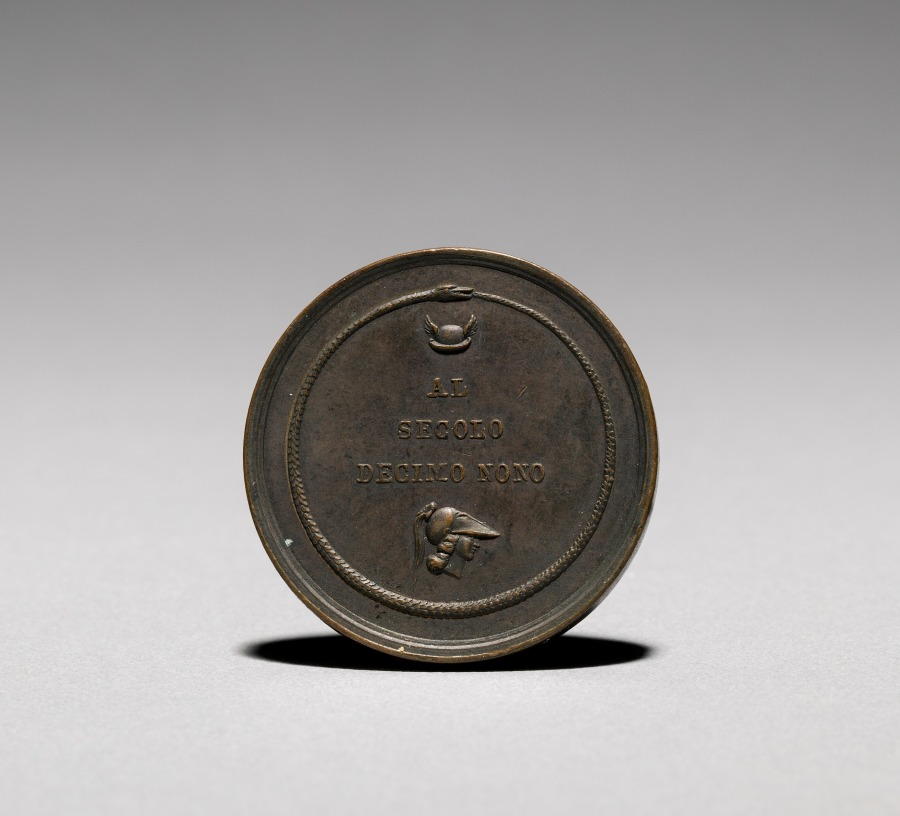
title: Medal: Antonio Canova (reverse)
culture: Italy, 19th century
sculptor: Francesco Putinati (Italian, 1775–1848)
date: early to mid-1800s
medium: bronze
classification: Metalwork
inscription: "A L SECOLO DECIMO NONO."